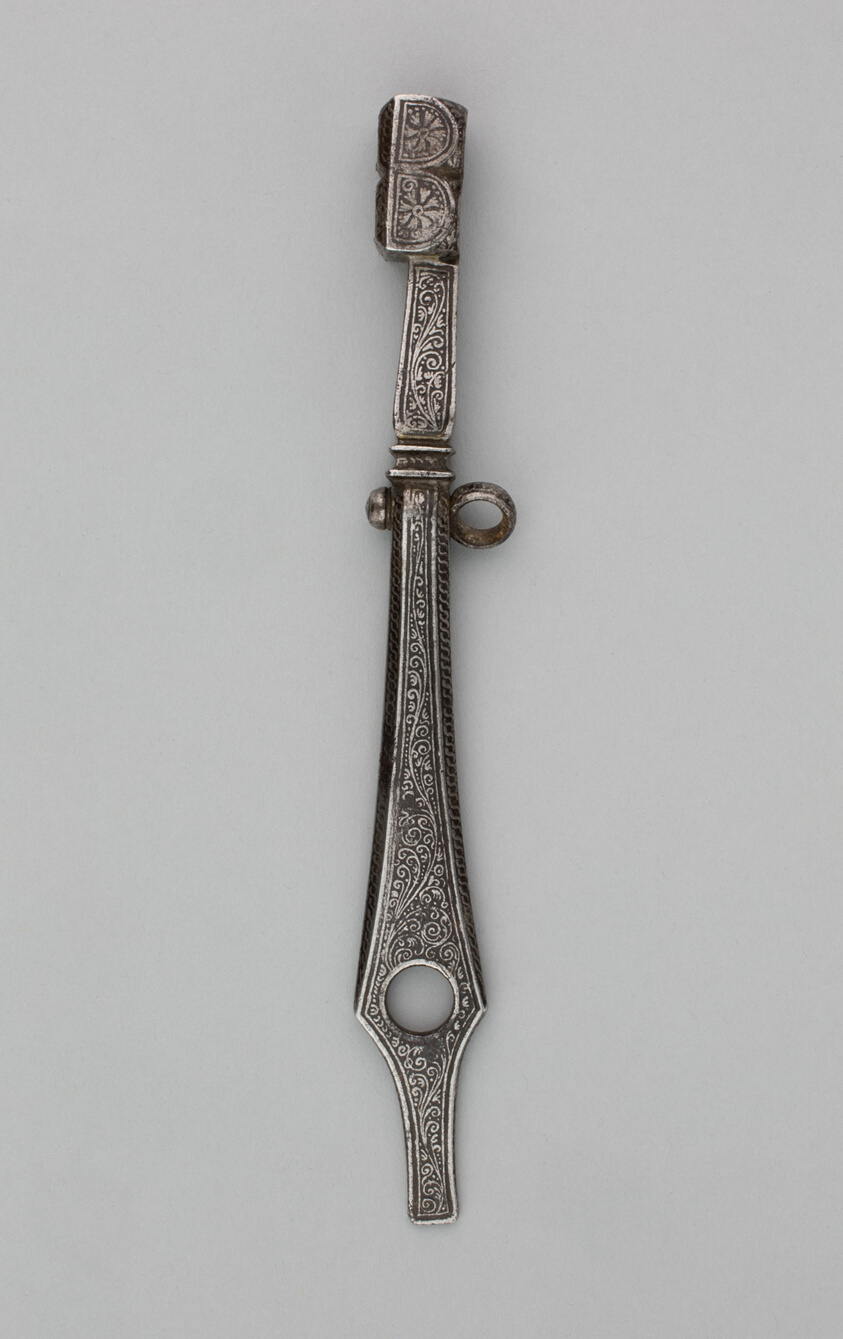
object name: Arms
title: Combined Wheel-Lock Spanner and Turnscrew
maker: German, Saxony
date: second half of 16th century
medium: Iron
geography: Saxony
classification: firearm-accessory; arms; arms and armor